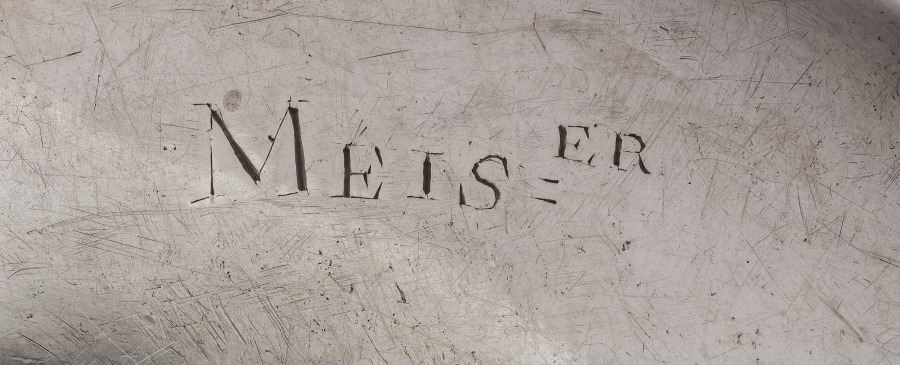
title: Cover for a Tureen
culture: France, Paris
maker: Henry Adnet (French, 1745)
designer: Juste-Aurèle Meissonnier (French, 1695–1750)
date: 1735–38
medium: silver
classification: Silver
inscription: engraved Meissonnier signature.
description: See entry for cover record 1977.182.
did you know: The langoustine, pigeon, and vegetables were cast using real examples giving the silver copies lifelike detail and appearance.